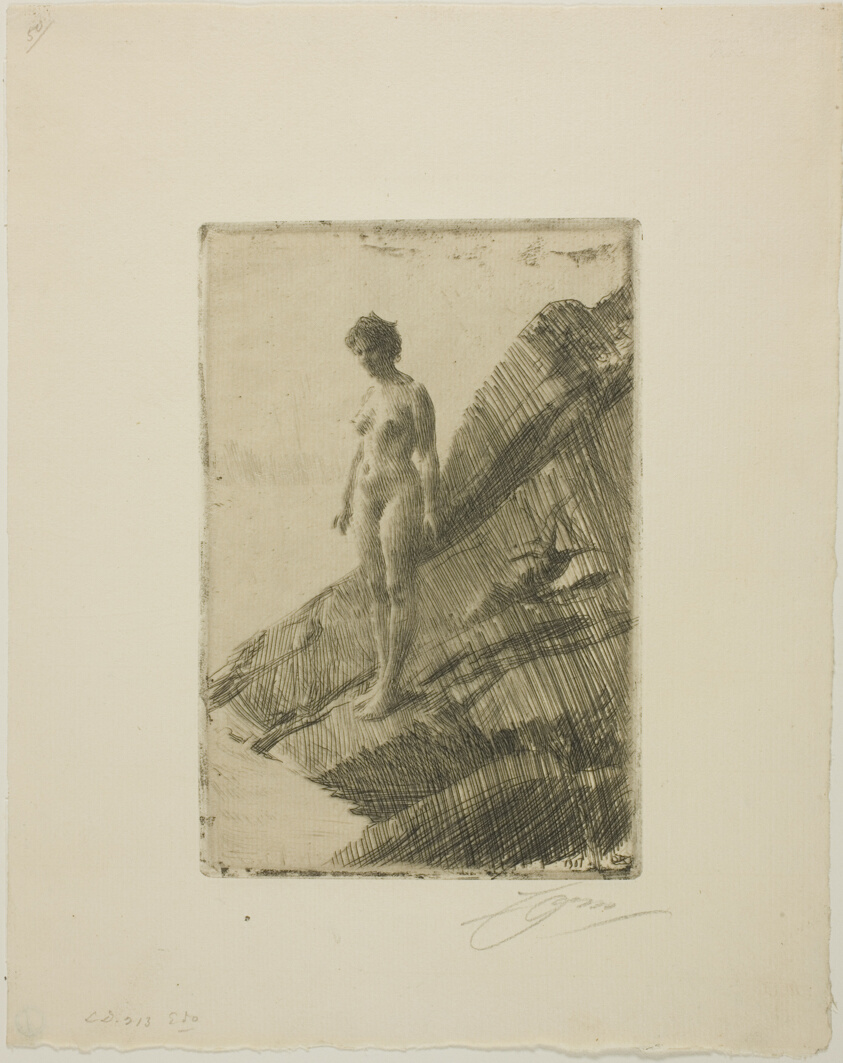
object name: Print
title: Edö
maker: Anders Zorn (Swedish, 1860-1920)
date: 1907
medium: Etching on ivory laid paper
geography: Sweden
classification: etching; print; prints and drawing